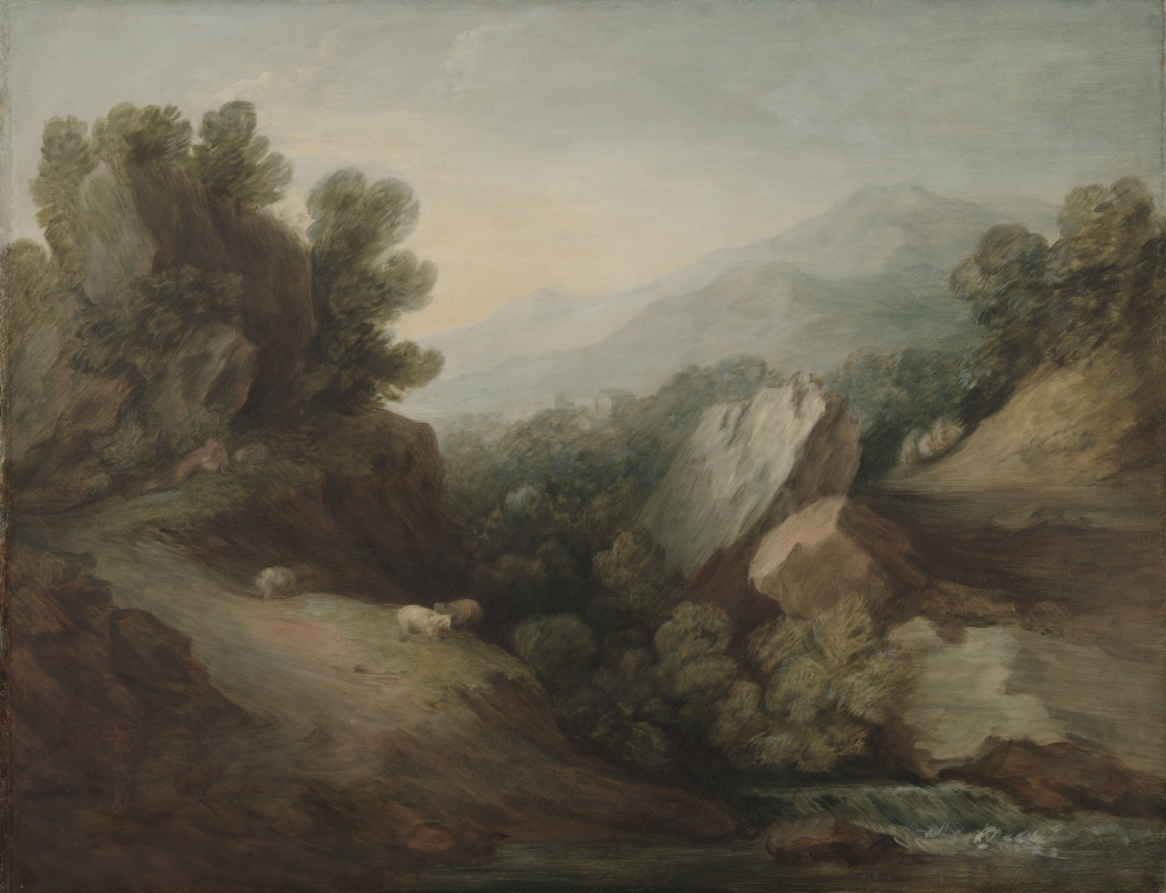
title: Rocky, Wooded Landscape with a Dell and Weir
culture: England, 18th century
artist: Thomas Gainsborough (British, 1727–1788)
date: c. 1782–1783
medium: oil on canvas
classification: Painting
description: In a sketchy manner, Gainsborough convincingly singled out the various elements comprising this sweeping landscape—meadow, rocks, trees—by only slightly varying colors and brushstrokes. At the same time, however, a great sense of unity prevails. Although the bulk of Gainsborough's artistic output was portraits, he insisted that landscape was his first love.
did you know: Gainsborough collected and was inspired by Dutch landscape painting.